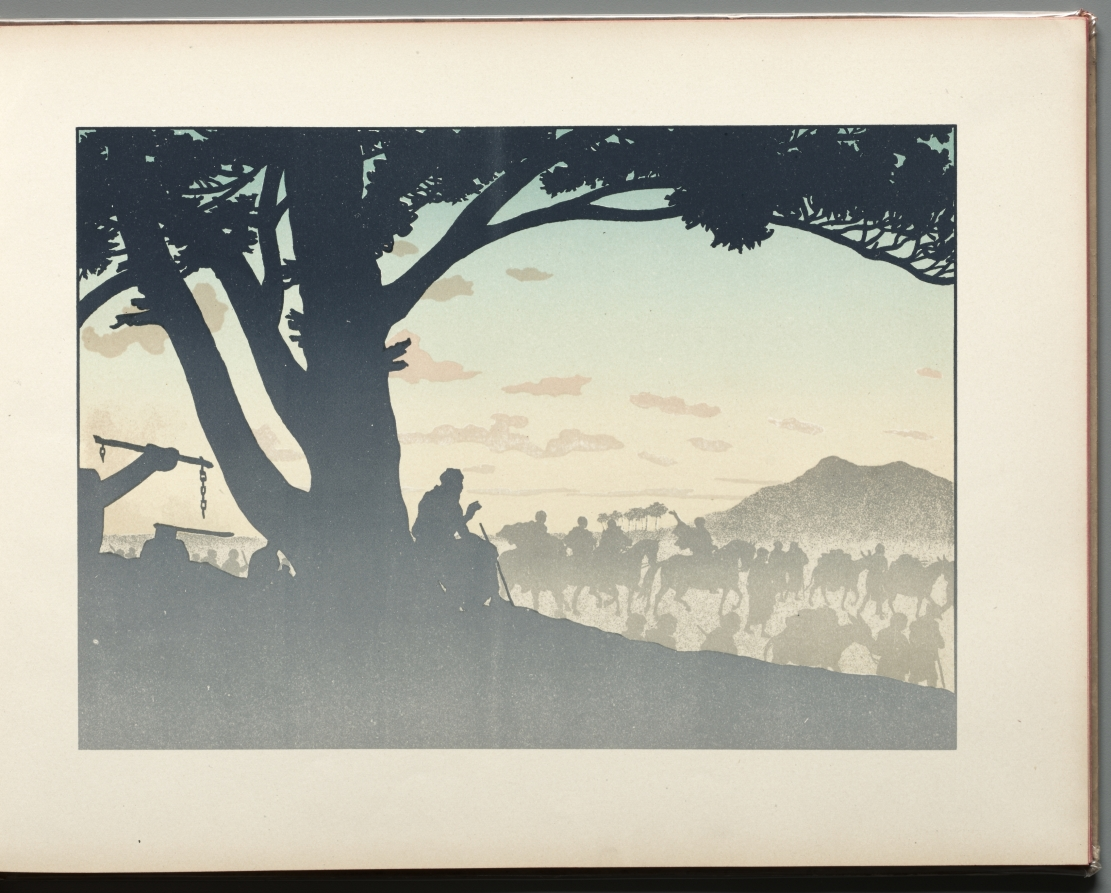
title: The Prodigal Son: page 13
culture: France, 19th century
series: Bound Volume illustrating the poetry and music of Georges Fragerolle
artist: Henri Rivière (French, 1864–1951)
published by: E. Flammarion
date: 1895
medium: 15 color lithographs in a bound volume illustrating the poetry and music of Georges Fragerolle: color lithograph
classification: Bound Volume